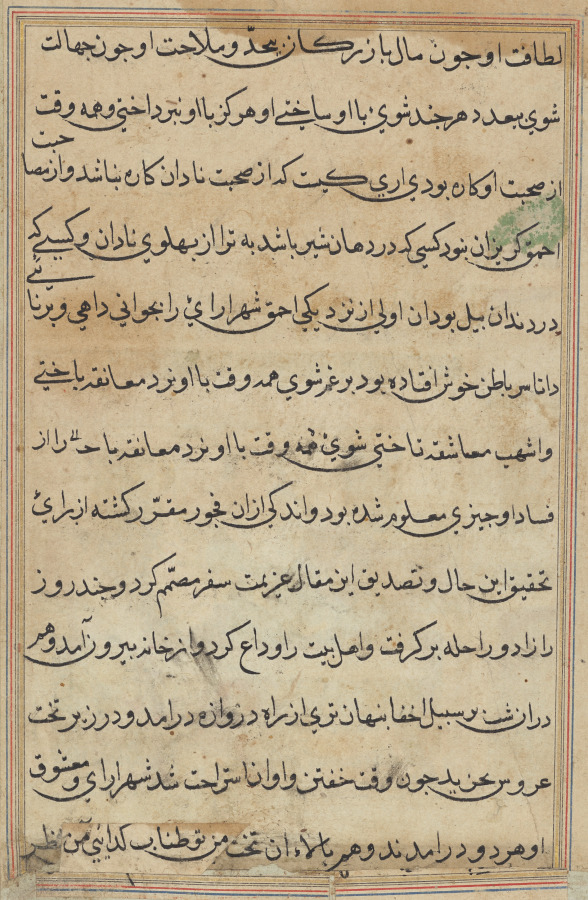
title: Page from Tales of a Parrot (Tuti-nama): text page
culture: Mughal India, court of Akbar (reigned 1556–1605)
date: c. 1560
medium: gum tempera, ink, and gold on paper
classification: Painting